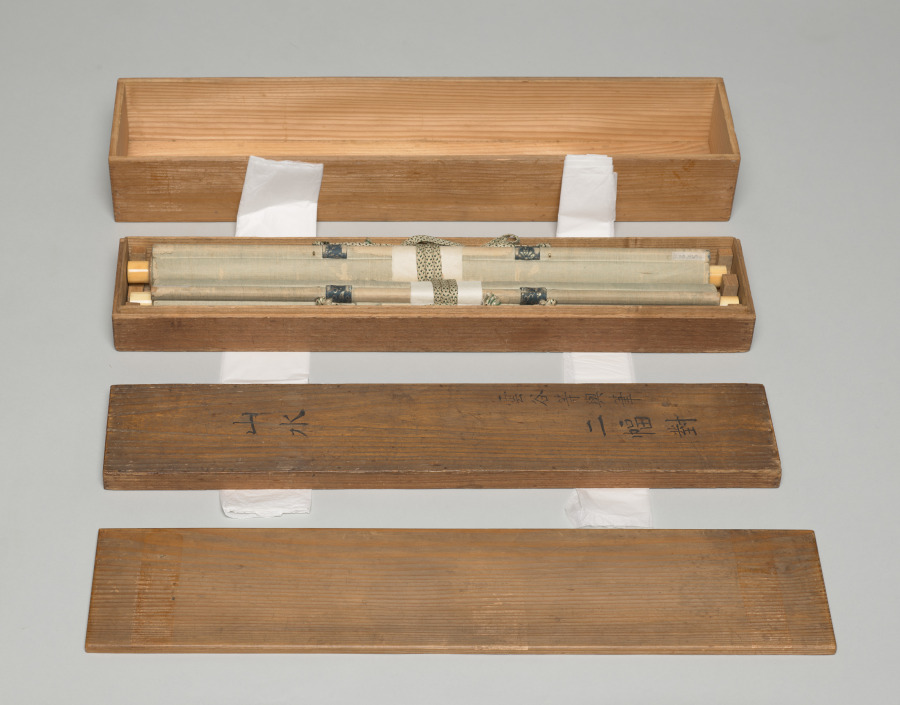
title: Landscapes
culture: Japan, Edo period (1615–1868)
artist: Unkoku Tōyo (Japanese, 1612–1688?)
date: mid- to late 1600s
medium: pair of hanging scrolls; ink and light color on paper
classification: Painting